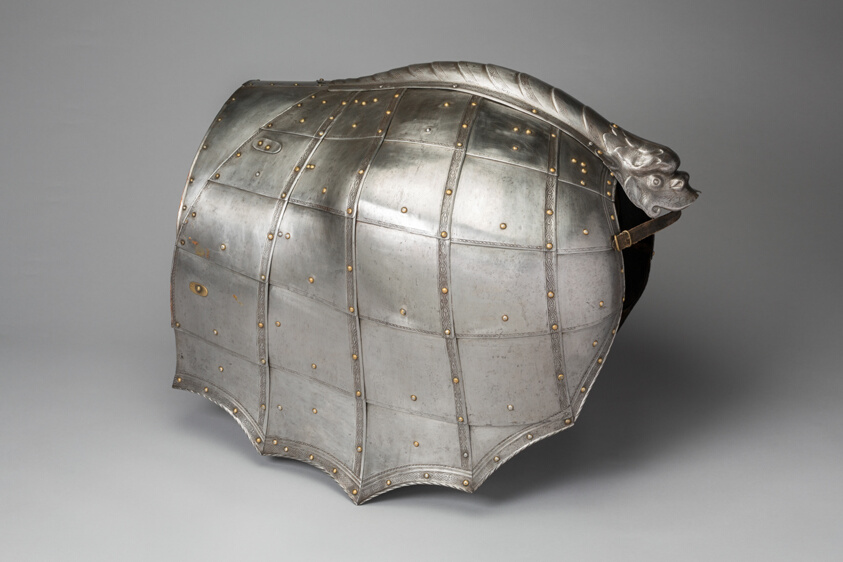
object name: Armor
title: Crupper with Tail Guard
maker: Southern German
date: mid–16th century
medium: Steel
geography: Augsburg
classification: horse equipment; armor; arms and armor